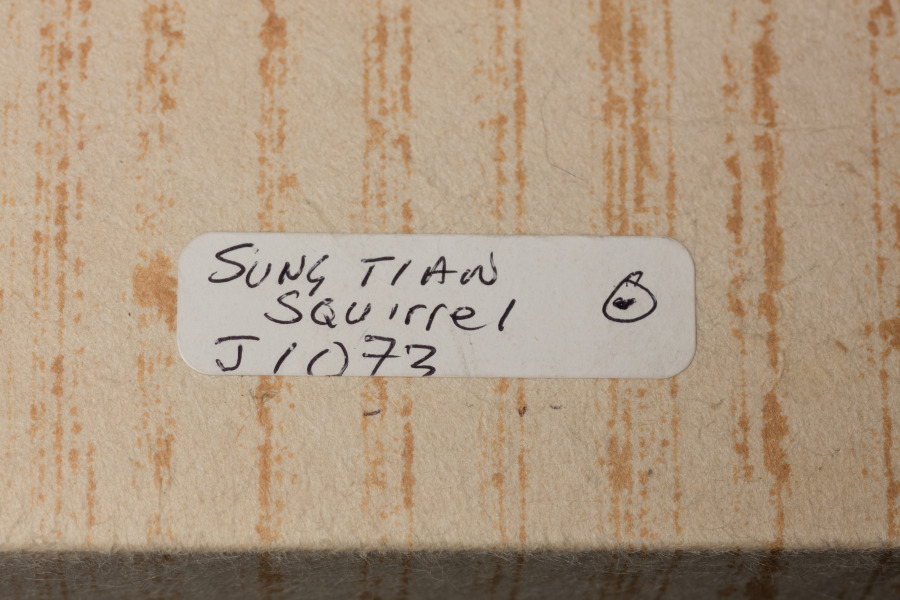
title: Squirrel on a Pine Branch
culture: China, Ming dynasty (1368–1644)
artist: Song Tian (Chinese, active 1300s)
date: 1500s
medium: hanging scroll, ink on paper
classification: Painting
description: This painting captures a squirrel in action, distracted and twisting its head while climbing and looking at a little bug to the right. The painter skillfully employs a combination of ink washes and fine brushstrokes to simulate the animal’s fur. Only three simple curved lines depict the squirrel’s claws. The subject of squirrels did not appear in Chinese painting before the late Southern Song (1127–1279) and Yuan periods (1279–1368). The painter Songtian was one of the few Yuan painters who specialized in this theme.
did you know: Although the evergreen pine does not indicate a time of year, the lively activity of the squirrel and the insect suggest a warm season.